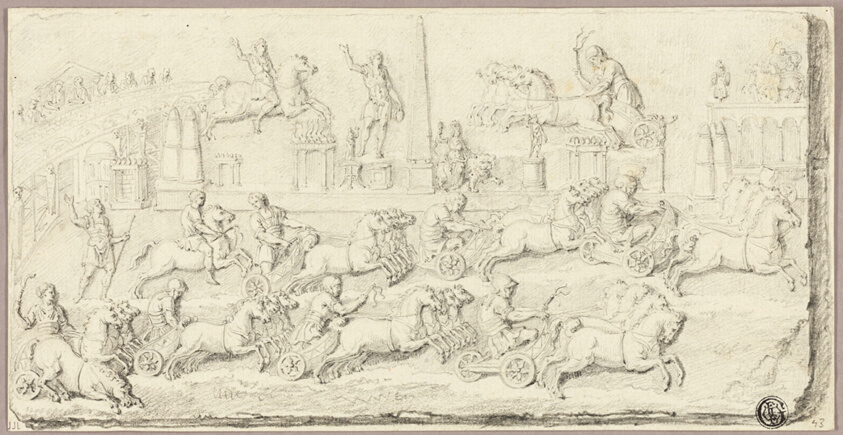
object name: Drawing and Watercolor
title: Roman Chariot Race (After Antique Bas Relief)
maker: Attributed to Sébastien Le Clerc, the Younger; French, 1676-1763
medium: Black chalk on ivory laid paper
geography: France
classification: chalk; paper; drawings (visual works); prints and drawing